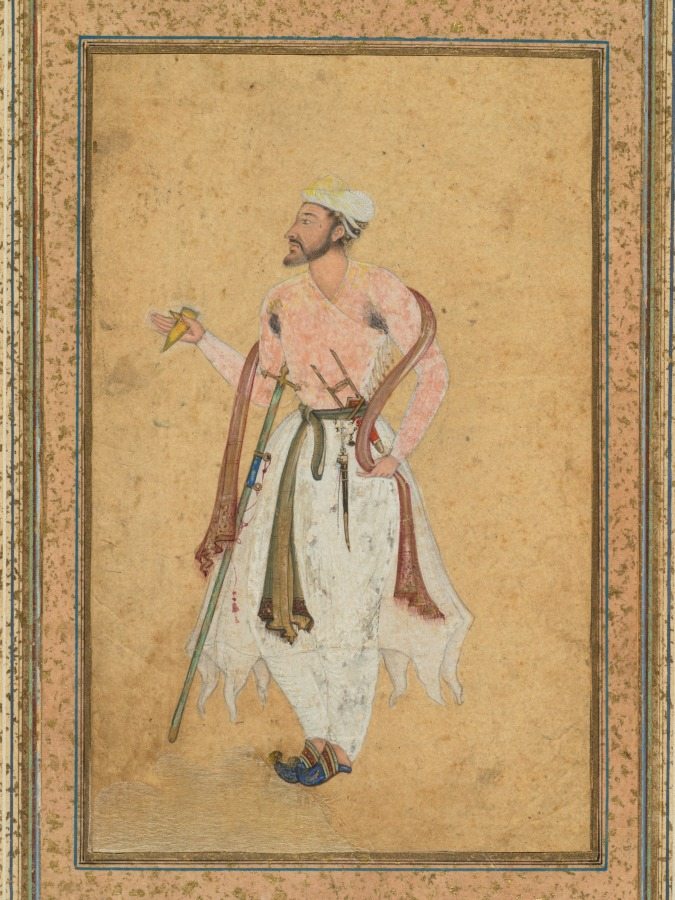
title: A Mughal courtier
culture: Mughal India, court of Akbar (reigned 1556–1605)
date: c. 1575; border added probably 1700s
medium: Gum tempera and gold on paper, mounted with gold-sprinkled borders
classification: Painting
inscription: Inscription in top margin, upside-down in nasta‘liq script, probably added c. 1700s: Sarkhod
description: This sensitive portrait is among the earliest surviving individual portraits from the Mughal atelier. He remains unidentified by inscription, since such portraits were made for the emperor Akbar who was unable to read. Realism in portraiture developed under Akbar as a means of keeping records of gifts and promotions without written notations. The figure conspicuously grasps the maroon and gold scarf in his left hand, which suggests that it may have been the gift from the emperor that would have occasioned the portrait. The array of blades he carries indicates that he was conscripted into military service at the Mughal court.